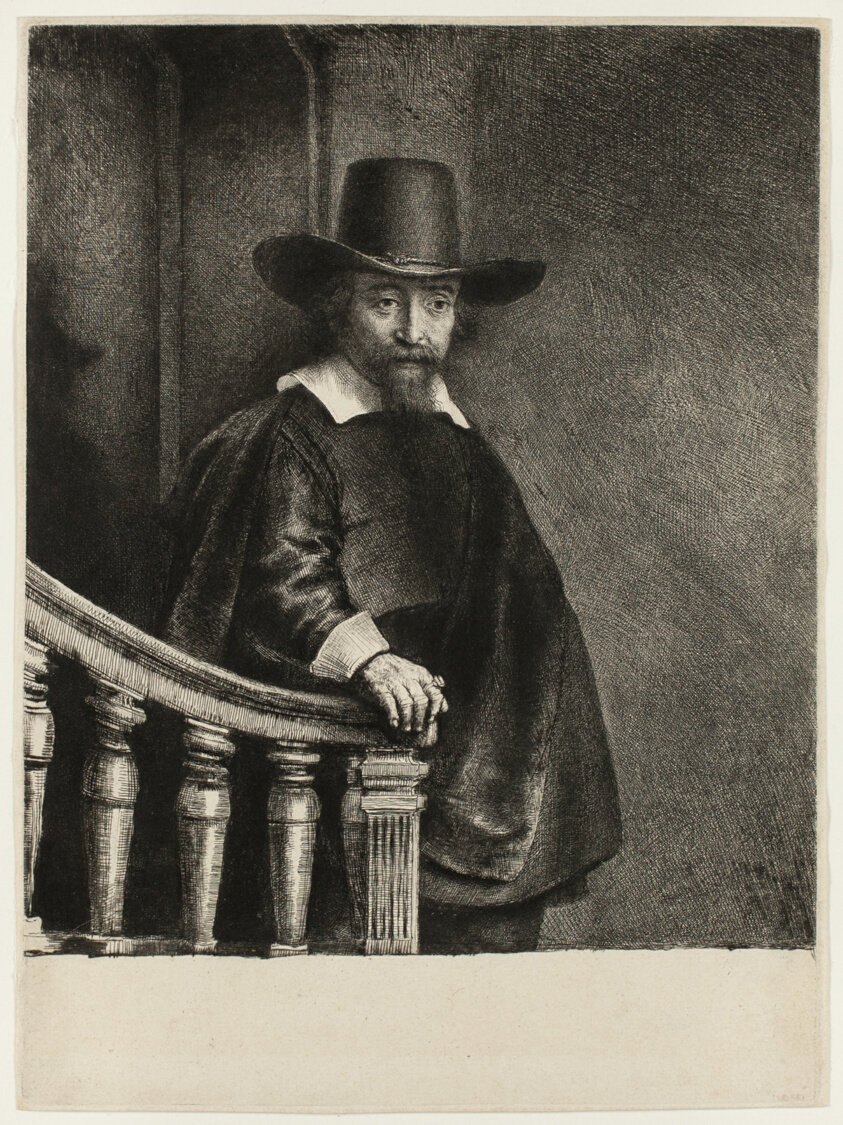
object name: Print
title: Ephraim Bonus, Jewish Physician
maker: Rembrandt van Rijn (Dutch, 1606-1669)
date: 1647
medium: Etching and drypoint in black on ivory laid paper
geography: Holland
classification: etching; print; prints and drawing; paper; drypoint